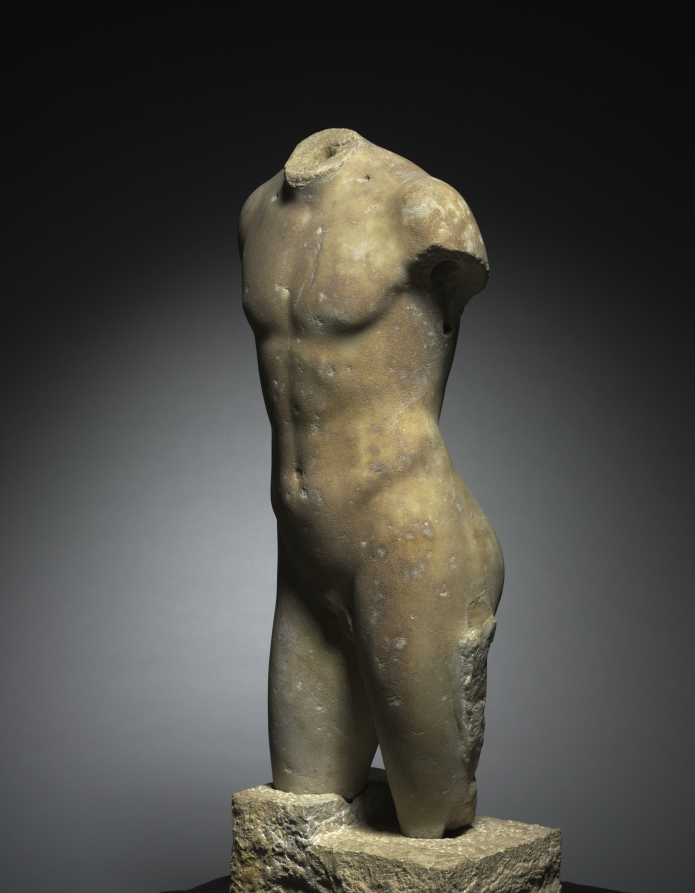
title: Torso of a Youth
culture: Greece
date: c. 150–100 BCE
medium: marble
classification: Sculpture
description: The exceptional workmanship suggests that this sculpture was carved by a Greek sculptor. Its incomplete state of preservation makes precise identification difficult, but it was most likely an Apollo or Dionysos, modeled in the soft, somewhat effeminate style of Praxiteles. The museum’s Apollo Sauroktonos is a useful parallel. The two drill holes in the upper chest are ancient and were possibly used to support separate long tresses of hair. The sculpture may well be a copy of a fourth-century original.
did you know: It was common practice in the 1700s and 1800s to attach new heads or limbs to fragmented ancient statues like this one.